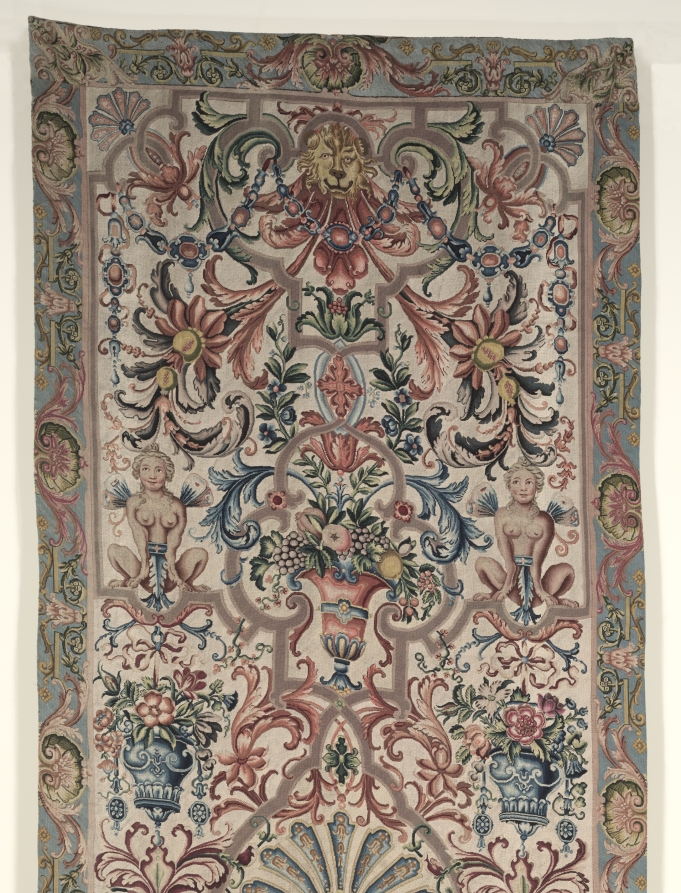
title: Needlework Bed Hanging (2 of 2)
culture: France, late 17th century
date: c. 1690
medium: petit point embroidery; silk and wool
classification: Embroidery